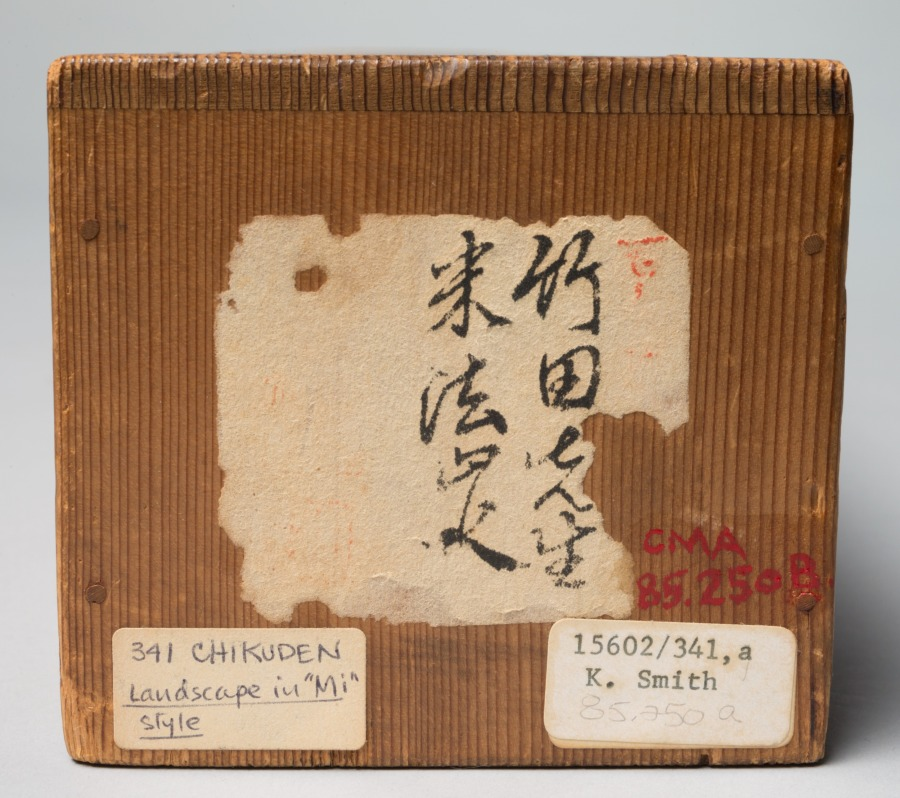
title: Mountain View and Blue Water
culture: Japan, Edo period (1615–1868)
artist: Tanomura Chikuden (Japanese, 1777–1835)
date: early 1800s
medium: hanging scroll; ink, color, and gold on paper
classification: Painting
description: Tanomura Chikuden was an eminent painter whose adopted son, Tanomura Chokunyū (1814–1907), was Seifū Yohei III’s painting teacher. This work was displayed at a gathering commemorating the 10th anniversary of Chokunyū’s death, something we know only because its custom-made box and archival documents have been carefully kept together. The box inscription also confirms that Chikuden was emulating the style of the Mi family of painters, active during China’s Southern Song dynasty (1127–1279). The painting’s Chinese-style silk wrapper is inscribed and sealed on its interior by members of Chokunyū’s community.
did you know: The mountain shapes are built up with multiple small wet strokes.